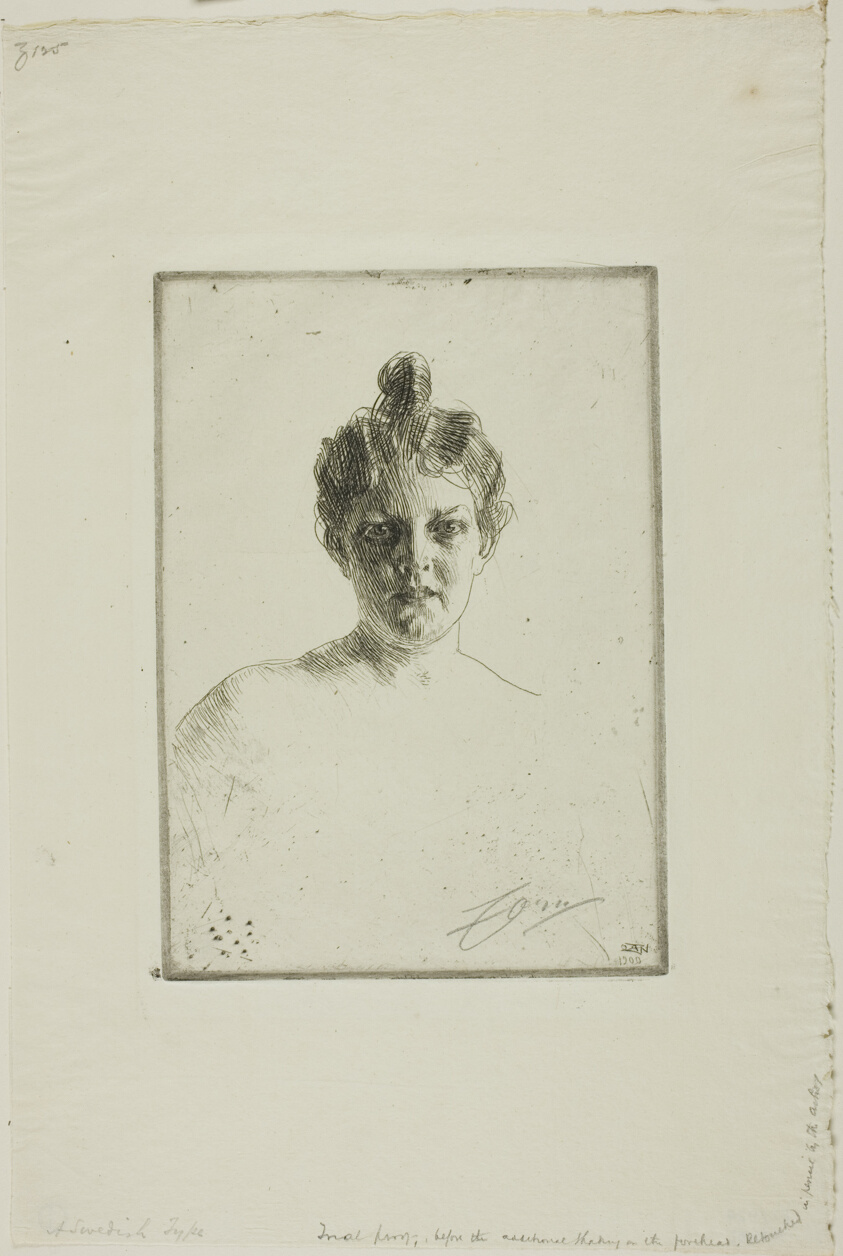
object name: Print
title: Mrs. Runeberg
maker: Anders Zorn (Swedish, 1860-1920)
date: 1900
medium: Etching on ivory wove paper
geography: Sweden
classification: etching; print; prints and drawing